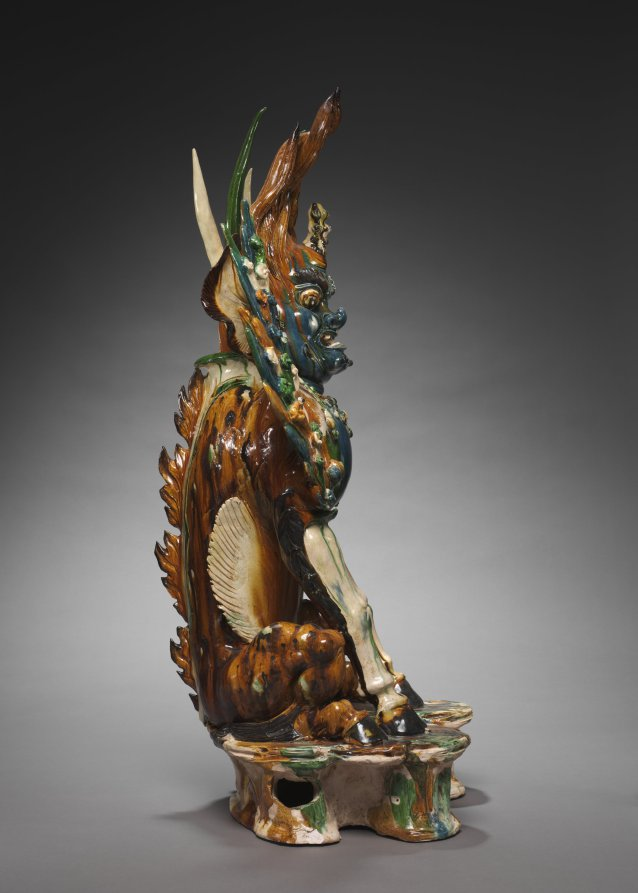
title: Tomb Guardian with Human Face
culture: China, probably Shaanxi province, Xi'an, Tang dynasty (618-907)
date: early 700s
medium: glazed earthenware, sancai (three-color) ware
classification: Ceramic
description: With their fierce expressions and exaggerated physical features, these two fantastic guardian creatures were intended to guard the entrance to a tomb, warding off evil as well as keeping the soul of the deceased from wandering. Known as "earth spirits" or qitou, this one sports a human face with huge protruding ears and a short horn surrounded by fiery, twisting hair; the other has an animal face and a pair of antlers growing above its eyebrows. Their many elongated spikes heighten the fearful intensity. Before tomb sculptures were placed in the tomb, they were carried through the streets in a funerary procession. Funerary gifts provided the deceased with means for the afterlife. They were also an expression of filial piety and demonstrated the wealth and power of the descendants.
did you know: Cobalt blue glaze used on the head and chest was imported from the Middle East.